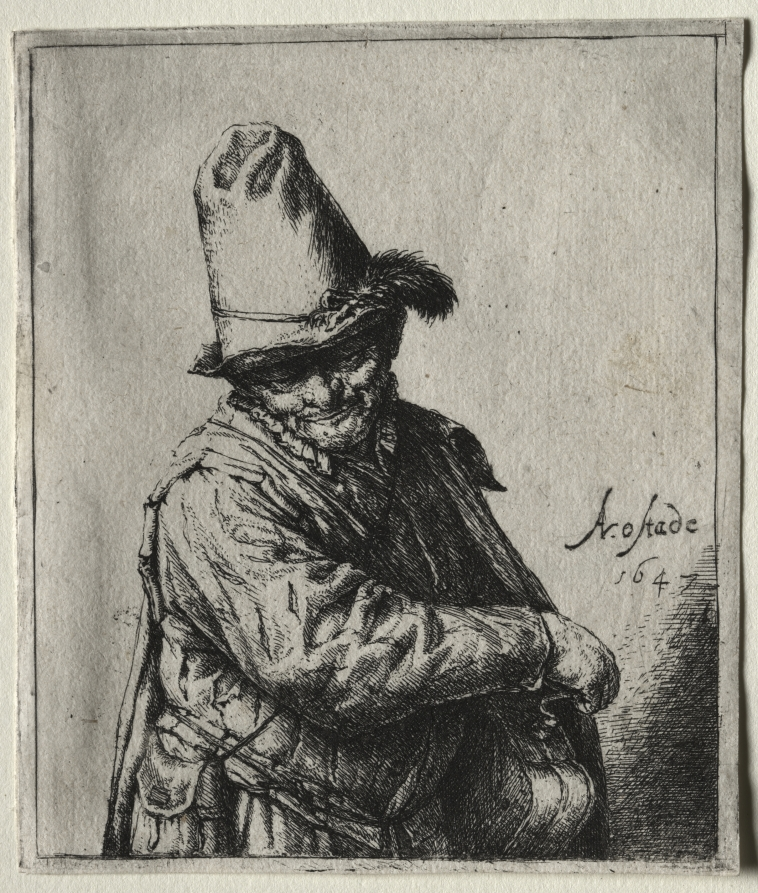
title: The Organ Grinder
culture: Netherlands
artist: Adriaen van Ostade (Dutch, 1610–1684)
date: 1647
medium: etching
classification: Print